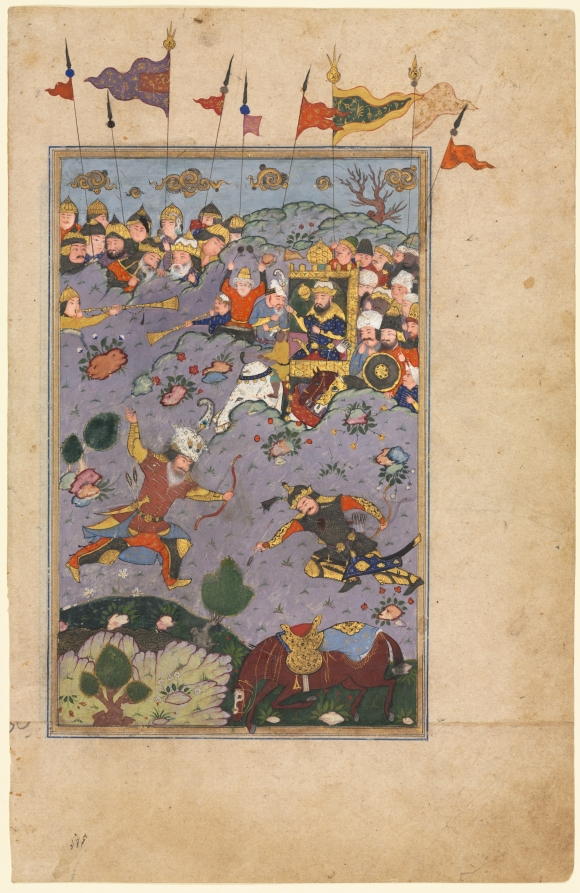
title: Rustam meets the challenge of Ashkabus, from a Shah-nama (Book of Kings) of Firdausi (Persian, about 934–1020)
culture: Iran, Shiraz, Safavid period (1501-1722)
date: c. 1590–1600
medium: opaque watercolor and gold on paper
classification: Manuscript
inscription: Script: none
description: Iran was losing a battle against Turan and the armies of its assembled allies from India and China. The hero Rustam arrived to pull the Iranian army back from the brink of destruction, slaying the enemy warrior Ashkabus on foot while allowing his horse Rakhsh to rest after a long, hard journey. The vast number of armies involved in the battle is indicated by the many banners that extend beyond the illustration’s top border. This painting was probably produced at Shiraz, one of Iran’s major cultural centers, far to the south of the Safavid capital of Tabriz. Artists and works of art moved back and forth steadily between Shiraz and the Deccan in southwestern India during the 1500s and 1600s. The section of the Shah-nama on the recto is famous for the clever conversational repartee between Rustam and his opponent Ashkabus. When Ashkabus remarked that in choosing not to ride a horse Rustam had signed his own death warrant, Rustam retorted, “Would it be the case then that in your country . . . lions, tigers, and crocodiles [all] ride on horses to battle?” Rustam then brought down the horse of Ashkabus with a single arrow; his next arrow pierced Ashkabus in the chest.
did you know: The enemy ruler of China sits in a howdah on the back of a white elephant.